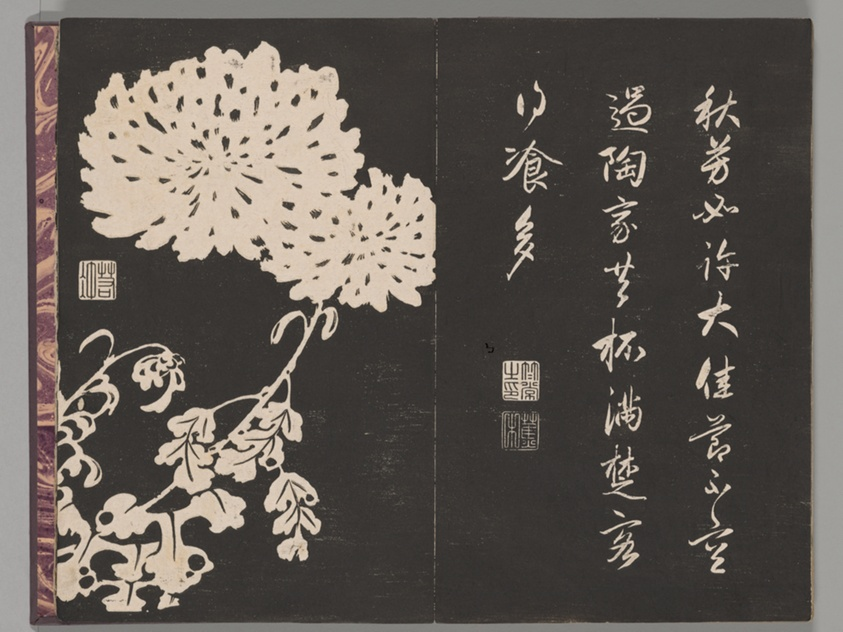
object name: Book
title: Soken sekisatsu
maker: Ito Jakuchu (Japanese, 1716-1800)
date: 1767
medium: Woodblock printed book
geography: Japan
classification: book